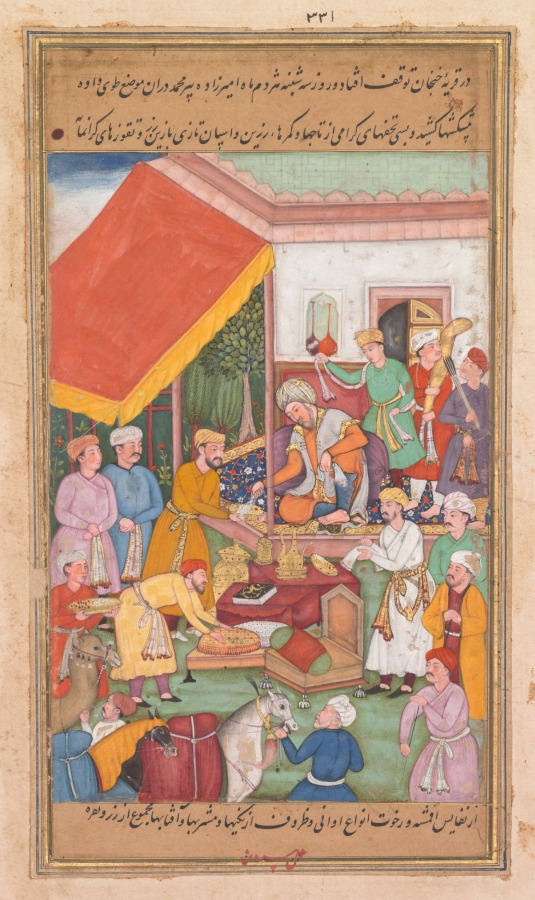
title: Timur distributes gifts from his grandson, the Prince of Multan, from a Zafar-nama (Book of Victories)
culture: Mughal India, court of Akbar (reigned 1556–1605)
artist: Shravana (Indian, active 1550s–c.1600)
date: 1598–1600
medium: Gum tempera, ink, and gold on paper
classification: Painting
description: The Turkic conqueror Timur (1336–1405) is the Mughal emperor Akbar’s most celebrated paternal ancestor. He sits on a terrace, shaded by a crimson awning. The blue carpet with gold border marking his high status is covered with a floral vine pattern that became fashionable in the 1500s. This scene takes place in a territory governed by Timur’s grandson, who sent him gifts of horses, camels, and a variety of luxury items. Timur is in the process of regifting them to members of his entourage in accordance with their merits.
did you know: Pre-modern giftwrap: Round textiles cover presentation platters.